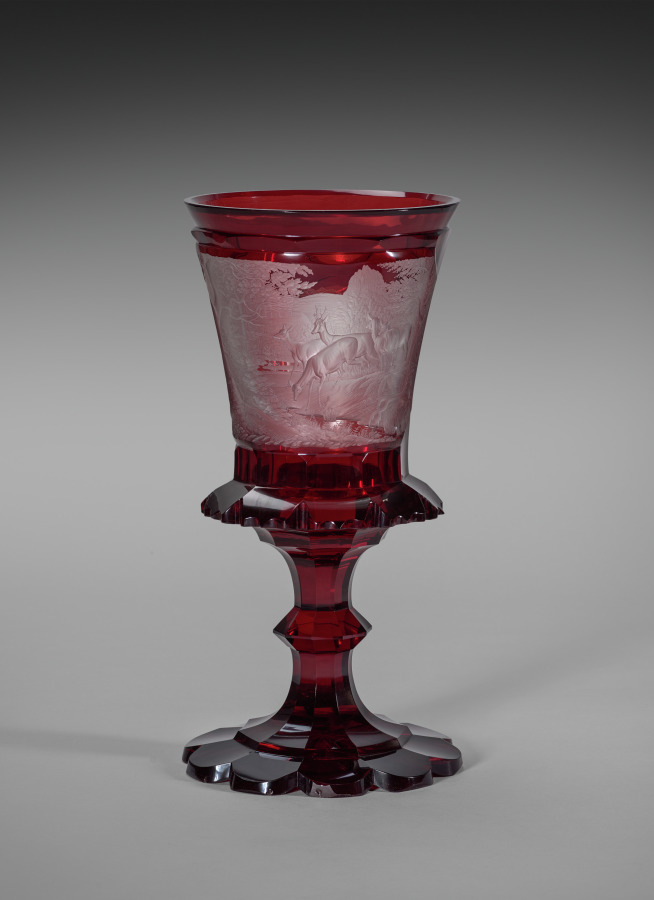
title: Cup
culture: Bohemia, 19th century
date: mid-1800s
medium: ruby glass with engraved decoration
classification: Glass